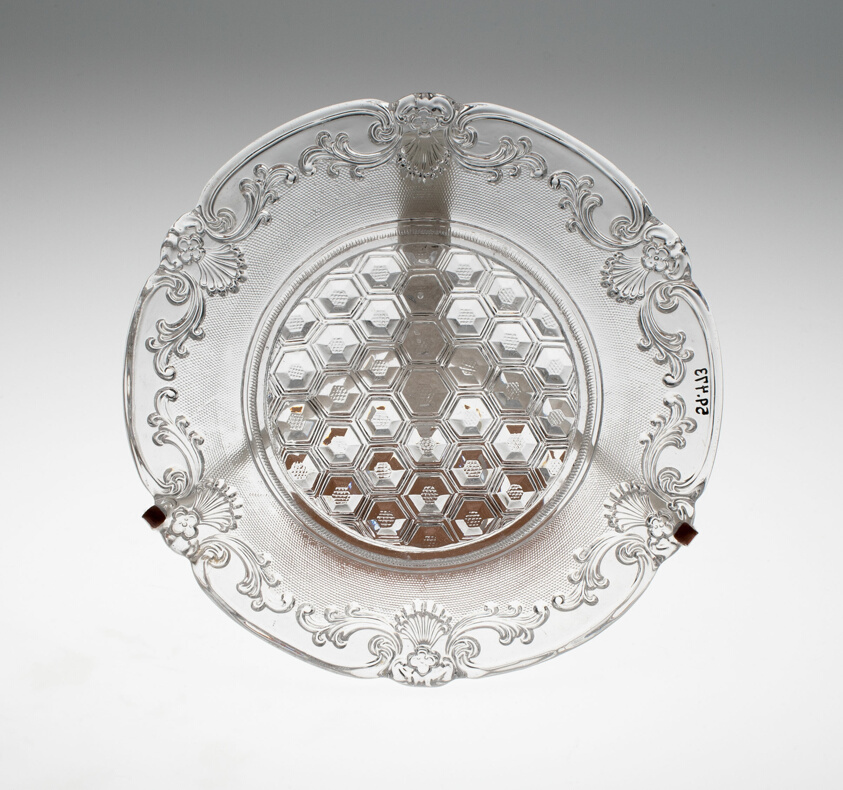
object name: Glass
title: Plate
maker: Baccarat Glassworks (French, founded 1764)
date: c. 1830/60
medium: Glass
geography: France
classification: plate (general, dish); glass; dish (vessel); european decorative arts